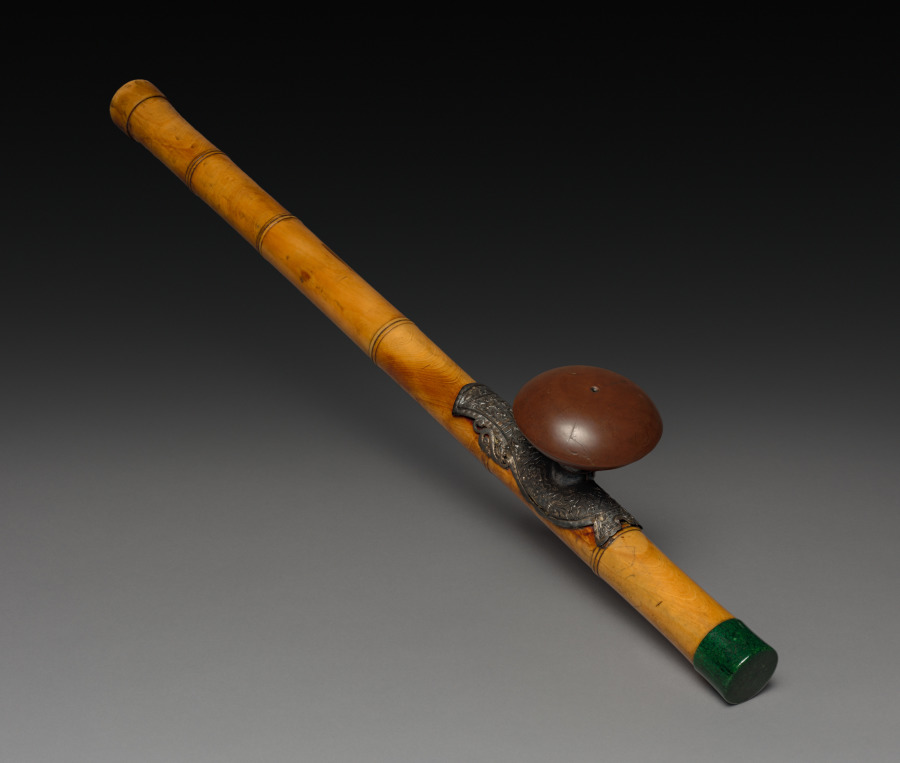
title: Opium Pipe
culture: China, Qing dynasty (1644-1911)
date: 1800s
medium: ivory with repoussé decoration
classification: Miscellaneous